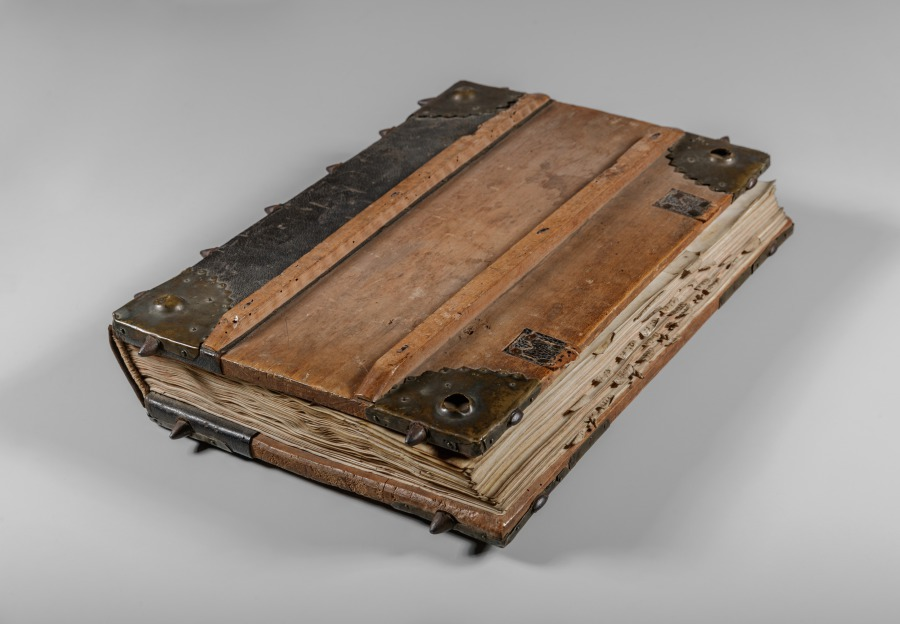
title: Gradual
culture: Italy, Verona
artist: circle of Girolamo dai Libri (Italian, 1474–1555)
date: c. 1520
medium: Ink, tempera, and gold on vellum; wood binding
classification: Manuscript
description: The liturgical book known simply as a “gradual” was the principal choir book used during the Mass. They were produced in multiple volumes, sometimes as many as 12, in order to cover the entire liturgical year. Every church required a set of graduals in addition to other liturgical books such as missals, antiphonaries, and gospel lectionaries. This volume appears to be the lone survivor from a larger set. Its illuminations were painted by an illuminator working in the circle of the much-esteemed and highly imitated painter Girolamo dai Libri of Verona, who was a prolific painter of altarpieces as well as illuminations for books.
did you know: Girolamo dai Libri was only 16 years old when he painted his first altarpiece.